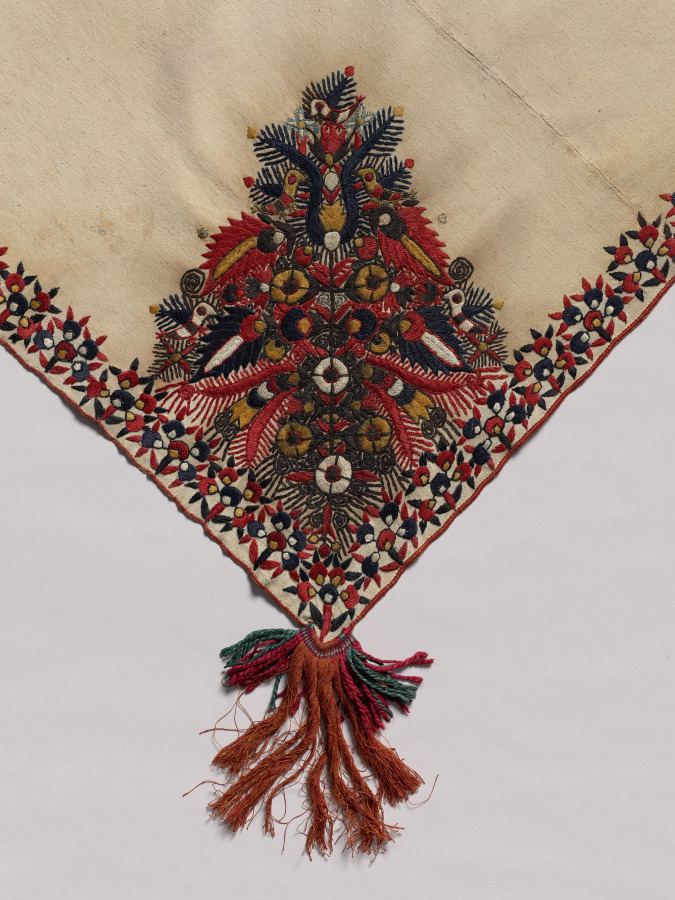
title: Furnishing textile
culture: Africa, North Africa, Algeria, Algerian embroiderer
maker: Algerian Embroiderer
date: 1800s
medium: Linen, silk, dye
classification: Embroidery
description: This textile is woven using undyed linen in a technique called a tabby weave. The artist then used red, blue, white, and ochre yellow silk threads to create embroidered floral borders and designs in each corner, topped with several birds. The style of these motifs also strongly resembles Turkish embroideries made in this period.